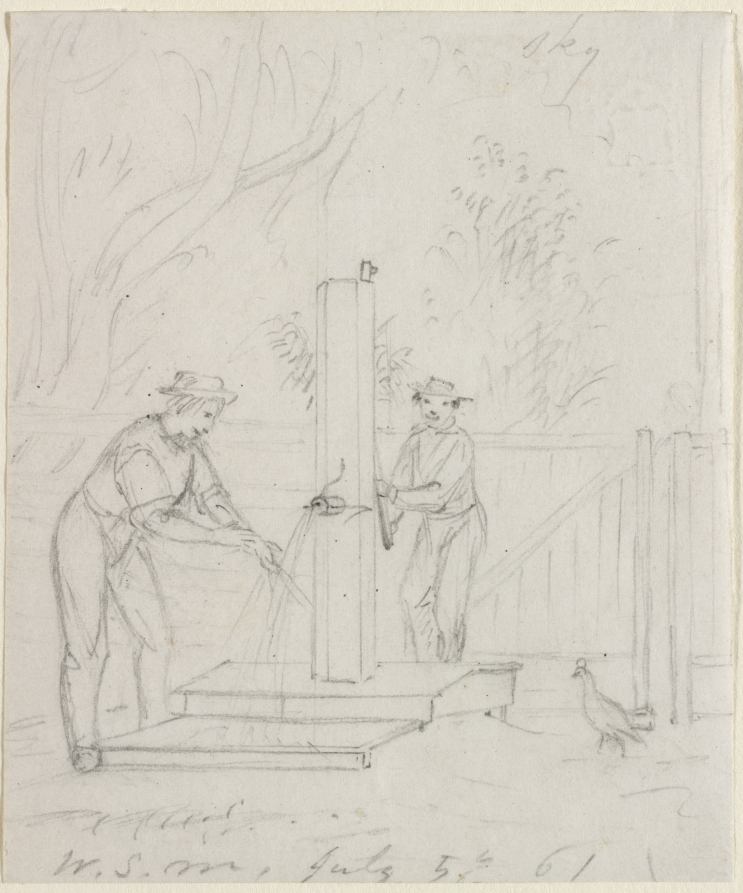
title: At the Pump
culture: America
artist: William Sidney Mount (American, 1807–1868)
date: 1861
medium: graphite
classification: Drawing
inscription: Signed, across bottom, in graphite: "W.S.M. July 5th 61"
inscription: Written in graphite by artist, upper right: "sky"